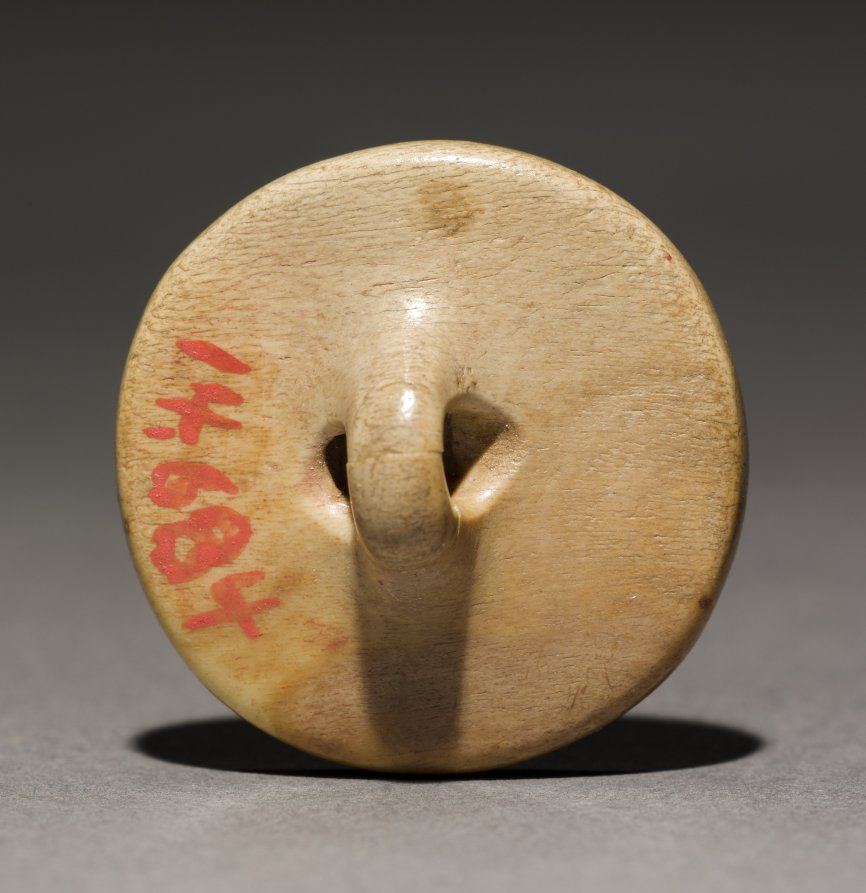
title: Seal Amulet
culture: Egypt, Old Kingdom (2647–2124 BCE), Dynasties 6–8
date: 2311–2140 BCE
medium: bone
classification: Amulets